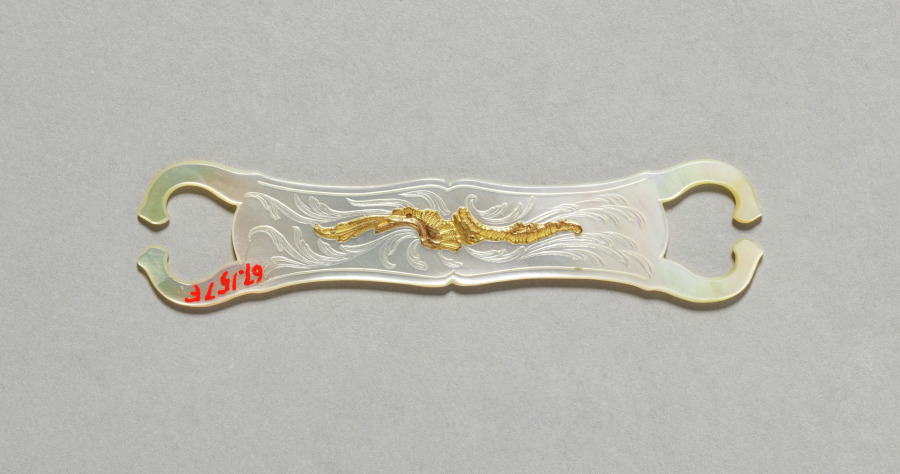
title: Bobbin from a Sewing Box (Nécessaire)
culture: Austria, possibly Vienna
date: c. 1765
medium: gold and mother-of-pearl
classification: Miscellaneous